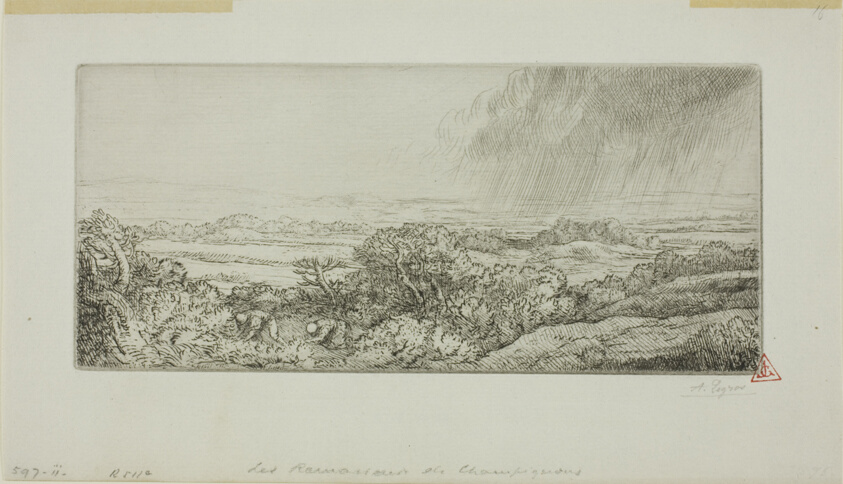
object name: Print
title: The Mushroom Gatherers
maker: Alphonse Legros (French, 1837-1911)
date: c. 1900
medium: Etching, drypoint and plate tone on light bluish-gray laid paper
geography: France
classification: etching; print; prints and drawing